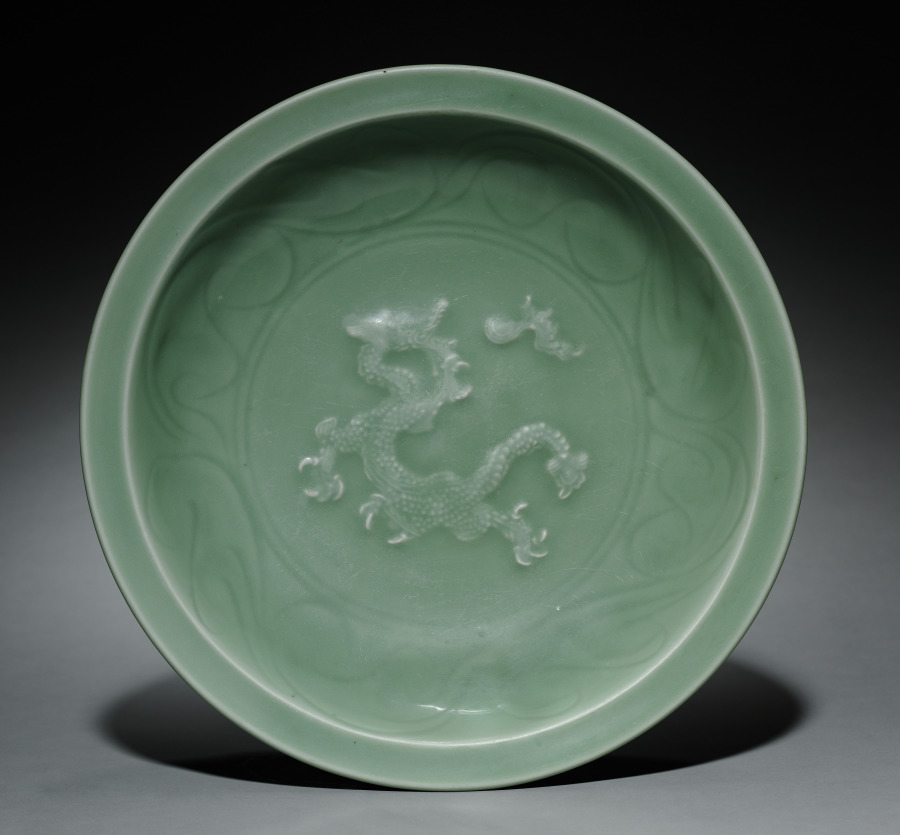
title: Dish with Dragon Pursuing Flaming Jewel in Relief: Longquan Ware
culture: China, Zhejiang province, Yuan dynasty (1271-1368)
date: early 14th Century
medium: glazed porcelain with molded decoration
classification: Ceramic